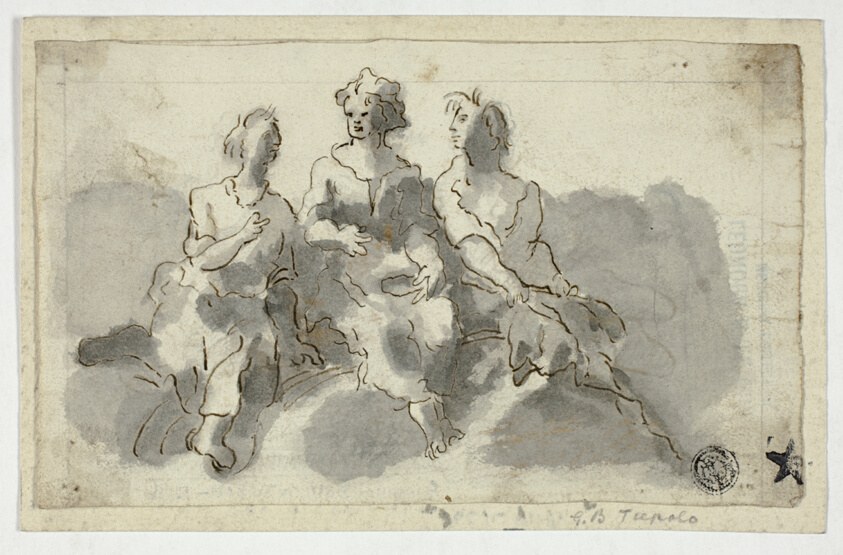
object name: Drawing and Watercolor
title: Three Seated Figures (recto); Seated Man in Profile (verso)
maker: Unknown Artist; Italian, 17th century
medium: Pen and brown ink and brush and gray wash on ivory laid paper (recto), and pen and brown ink with brush and brown wash on ivory laid paper (verso), tipped onto cream laid paper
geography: Italy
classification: pen and ink drawings; drawings (visual works); prints and drawing